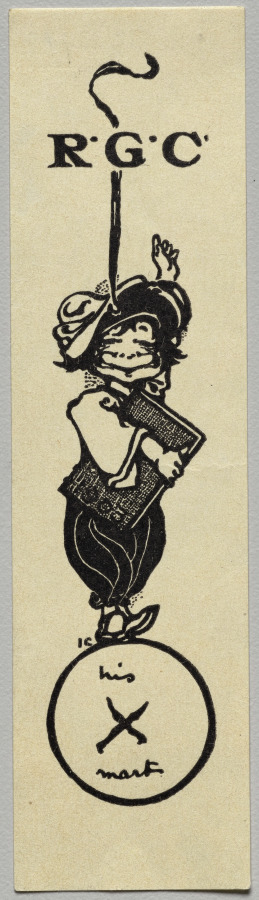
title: Bookplate: R. G. C.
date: 1903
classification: Print